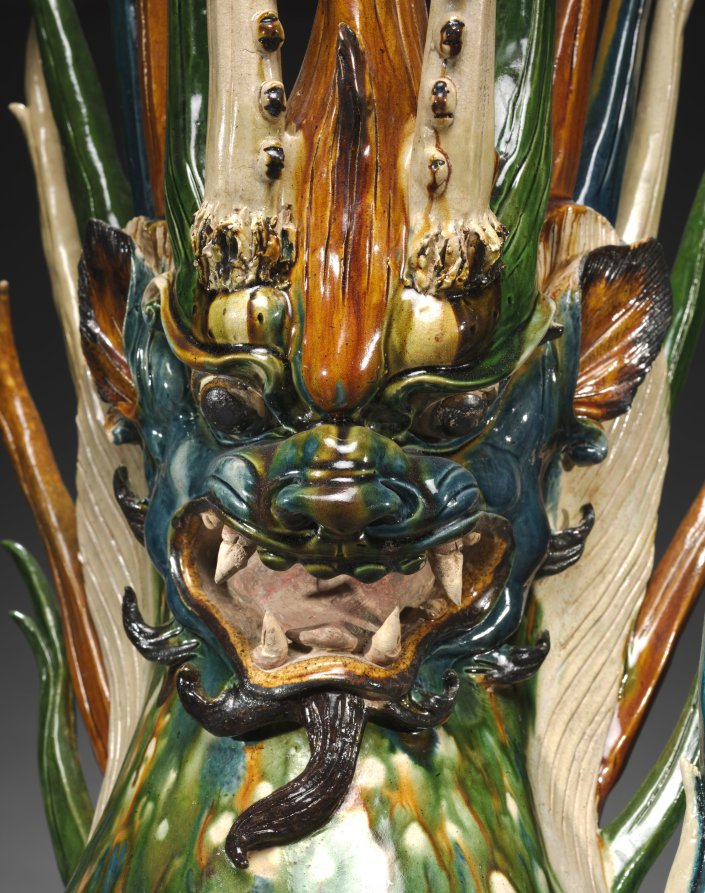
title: Tomb Guardian with Animal Head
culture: China, probably Shaanxi province, Xi'an, Tang dynasty (618-907)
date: early 700s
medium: glazed earthenware, sancai (three-color) ware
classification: Ceramic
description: With their fierce expressions and exaggerated physical features, fantastic guardian creatures were intended to guard the entrance to a tomb, warding off evil as well as keeping the soul of the deceased from wandering. Known as "earth spirits" or qitou, this one has an animal face and a pair of antlers growing above its eyebrows; the other sports a human face with huge protruding ears and a short horn surrounded by fiery, twisting hair. Their many elongated spikes heighten the fearful intensity. Before tomb sculptures were placed in the tomb, they were carried through the streets in a funerary procession. Funerary gifts provided the deceased with means for the afterlife. They were also an expression of filial piety and demonstrated the wealth and power of the descendants.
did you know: Sancai (three-color) glazes in green, amber, and transparent white, plus expensive cobalt blue glaze, show the high social status of the tomb’s occupant.